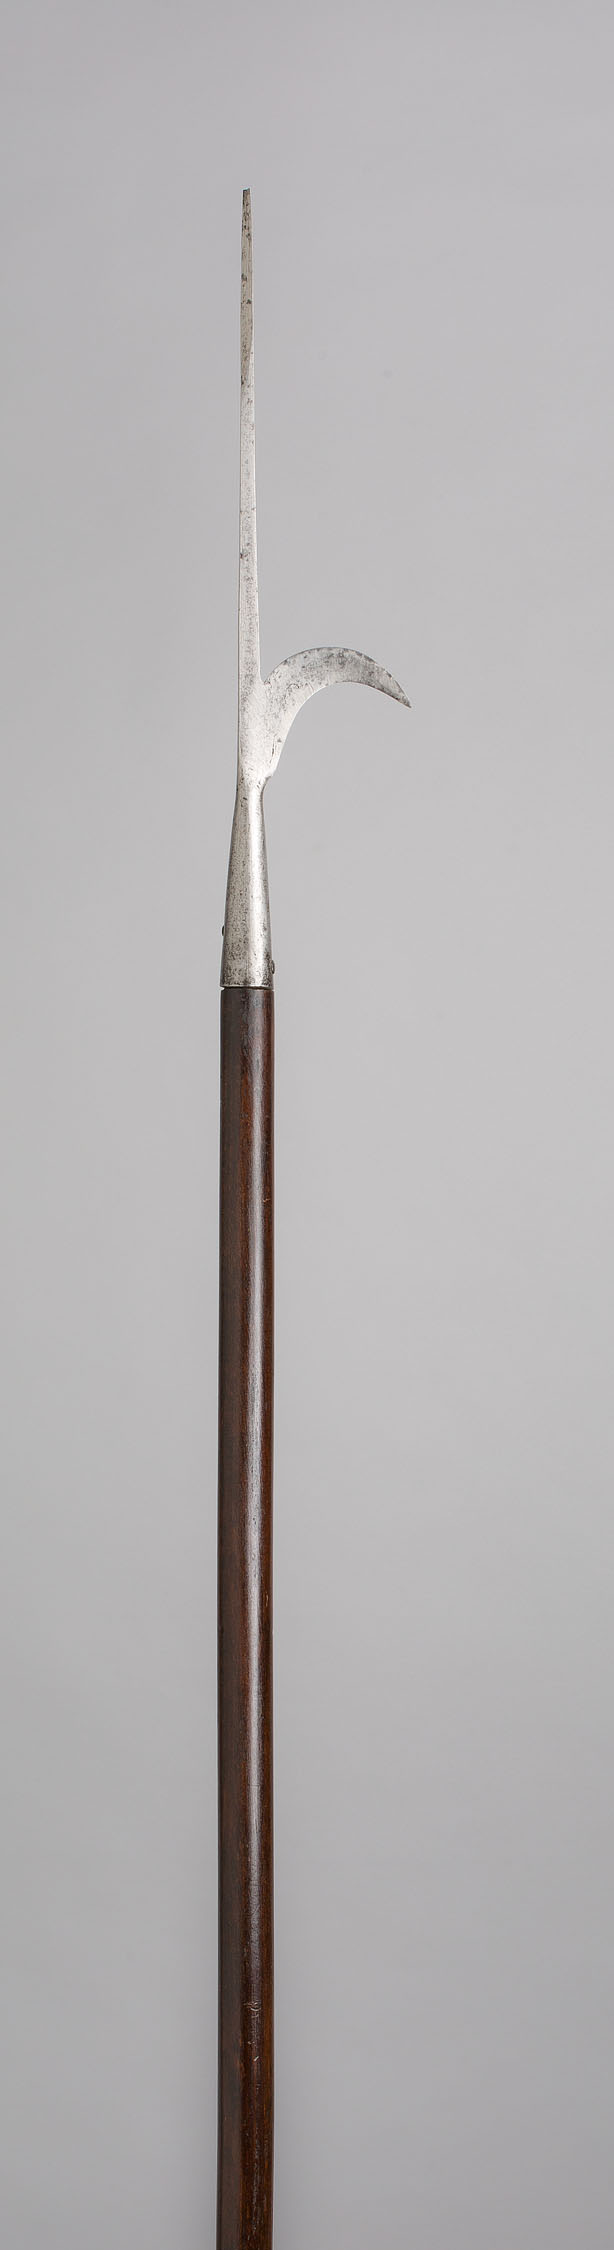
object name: Arms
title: Bridle Cutter Pike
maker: European, possibly Austrian, Salzburg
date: 18th century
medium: Steel and wood (ash)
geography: Salzburg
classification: edged weapon-staff; arms; arms and armor